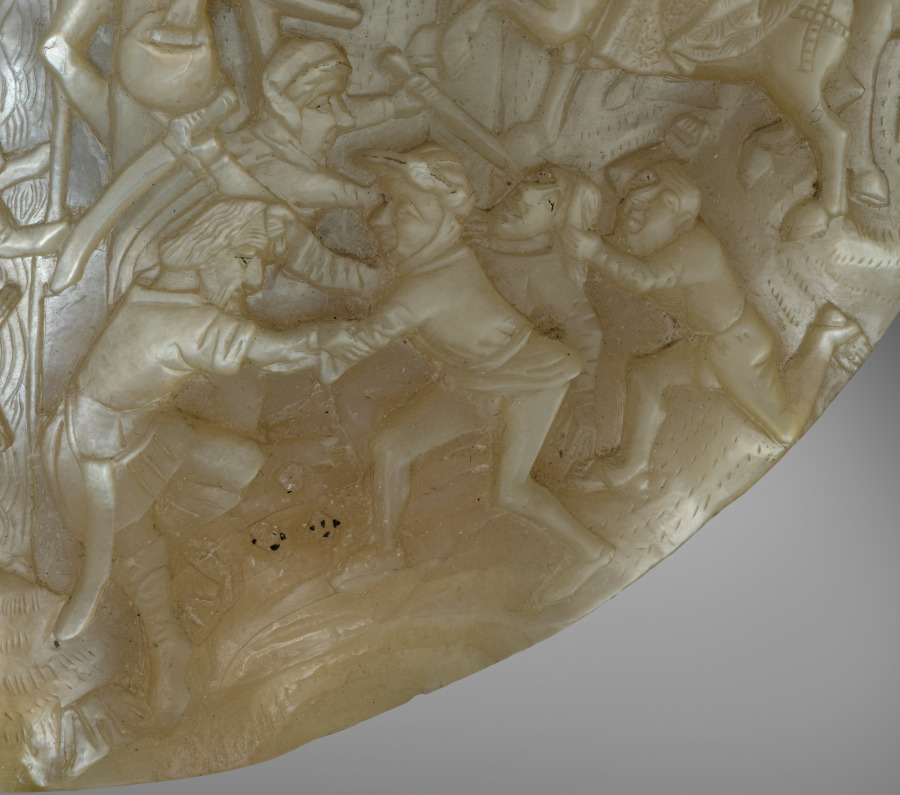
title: Calvary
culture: Germany, Middle Rhine?, 15th century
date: c. 1450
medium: mother-of-pearl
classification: Sculpture